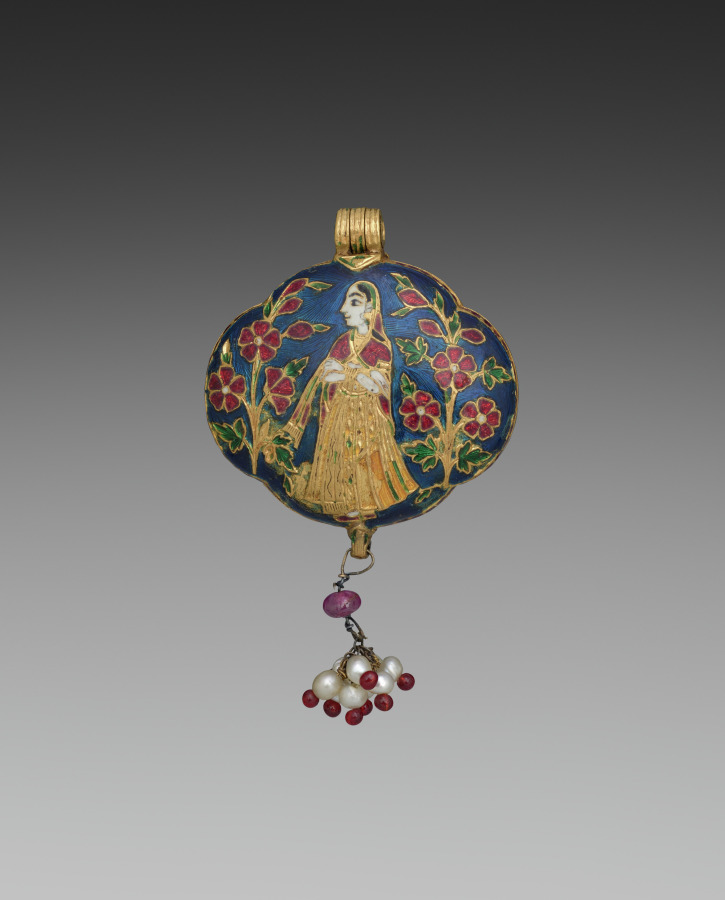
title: Locket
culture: Northwestern India, Rajasthan, Rajput Kingdom of Jaipur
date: 1700s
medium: gold and enamel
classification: Jewelry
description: This locket may have once been an amulet containing prayers and talismans or a container for perfume or other cosmetic items. At the center, a young woman stands between two groupings of large red flowers. The connections between women and nature have ancient precedents in India, often communicating auspicious fertility. Luxury enamels like this were the hallmark of 18th-century Jaipur goldsmiths and jewelry makers. This locket was given to the museum by the Twentieth Century Club, a women’s community group founded in the early 1900s with satellites across the United States.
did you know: Green glass, now mostly lost, once filled the lozenge shapes in the woman’s gown.